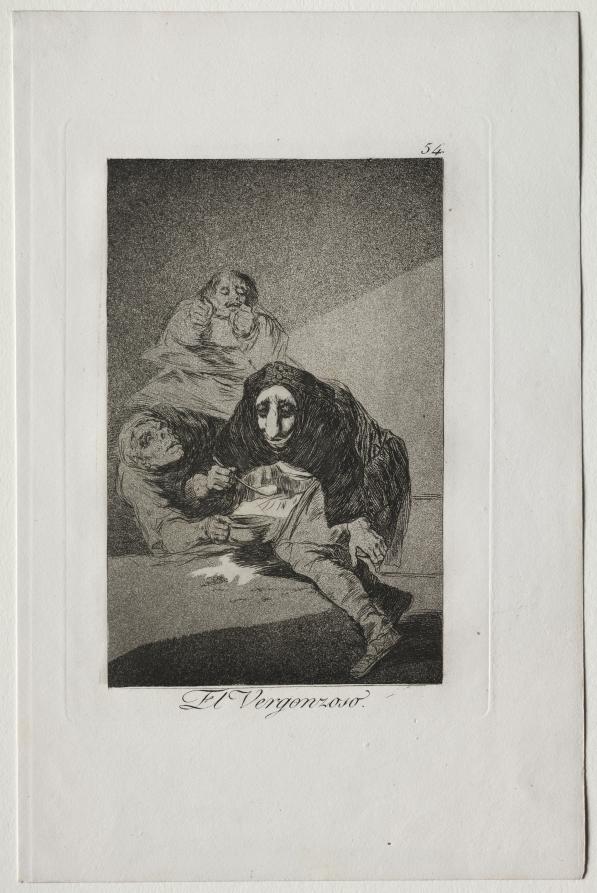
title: The Shamefaced One, Plate 54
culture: Spain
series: Los Caprichos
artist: Francisco de Goya (Spanish, 1746–1828)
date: 1799 (printed c. 1855)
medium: etching and aquatint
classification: Print